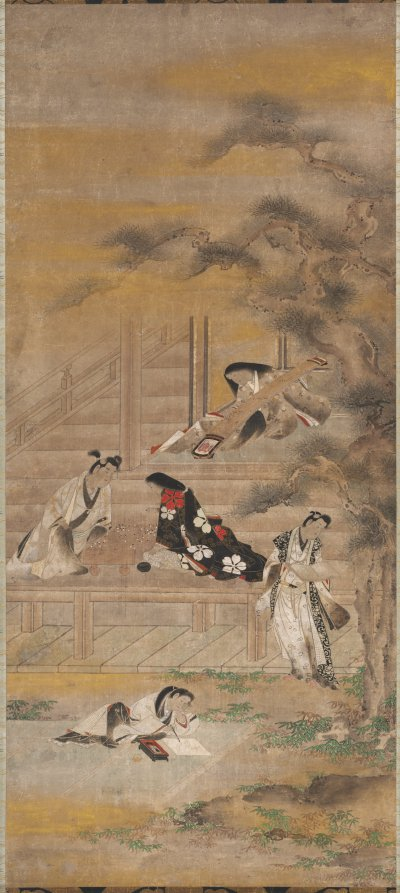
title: The Four Accomplishments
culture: Japan, Edo period (1615–1868)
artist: attributed to Iwasa Matabei (Japanese, 1578–1650)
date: c. 1620–50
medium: Hanging scroll; ink, color, and gold on paper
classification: Painting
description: This painting shows a woman playing a koto, a type of stringed instrument; a pair playing a board game called Go; a man deep in a book; and a boy painting an image of flowers. The group of fashionably dressed figures is set in and around a cozy residence, their poses conveying a sense of carefree pleasure. The scene is a playful response to a theme derived from Chinese culture that presents four notable pastimes of well-educated people.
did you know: The small, golden jar holds water to mix with the youth's ink for his painting.